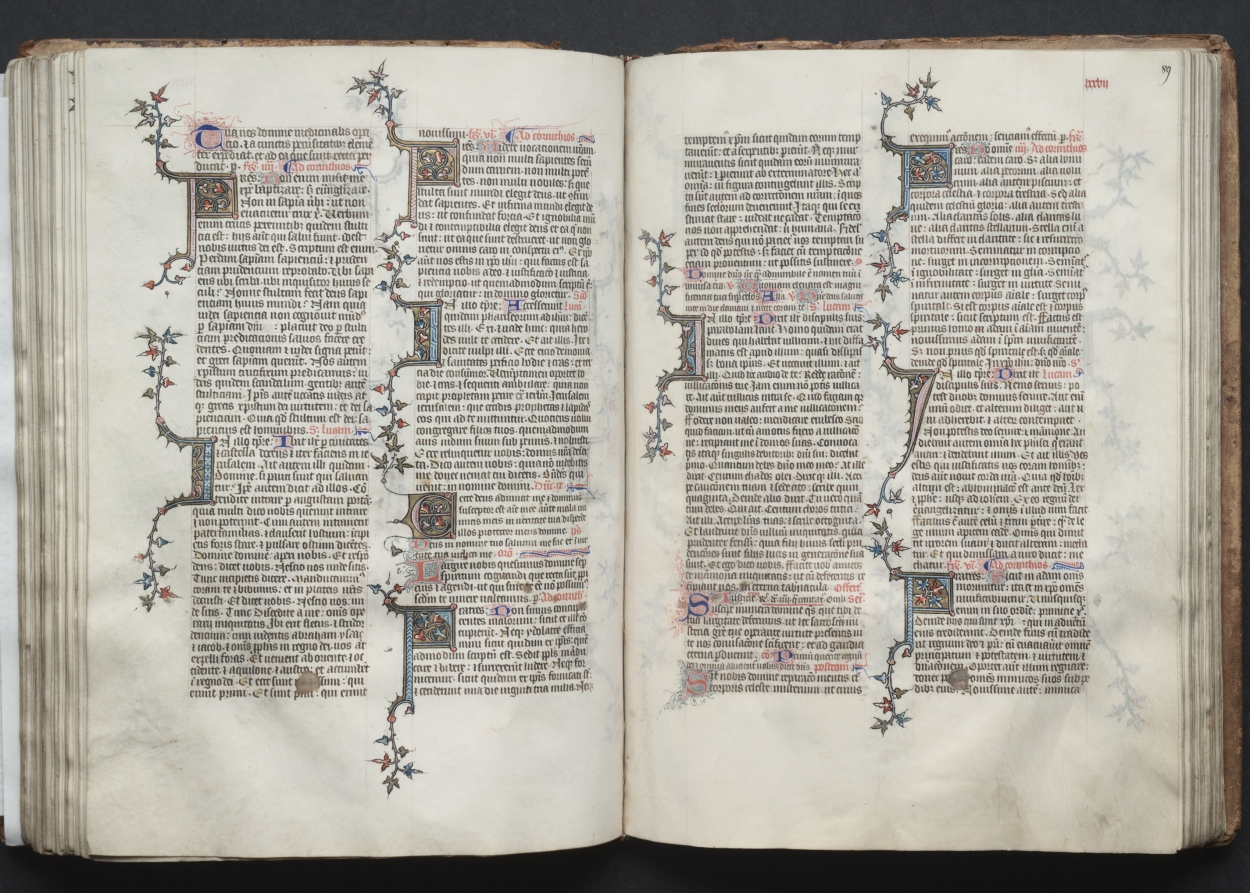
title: The Gotha Missal: Fol. 89r, Text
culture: France, Paris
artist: Master of the Boqueteaux (French)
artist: and Workshop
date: c. 1375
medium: ink, tempera, and gold on vellum; blind-tooled leather binding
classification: Bound Volume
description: The style and quality of this manuscript's decoration is typical of deluxe Parisian books made for aristocratic or royal patrons. Most of the book's decoration appears to be the work of the Master of the Boqueteaux, an artist active at the court of King Charles V (died 1380). His style was apparently shared by a number of book illuminators working in and around Paris. It is very possible that the Gotha Missal belonged to Charles V, but is not provable because the manuscript has no royal portraits and lacks a colophon. Given the book's magnificent decoration, however, it would seem that it was produced for a Valois prince, if not for the king himself. The manuscript receives its name from the German dukes of Gotha, its later owners.